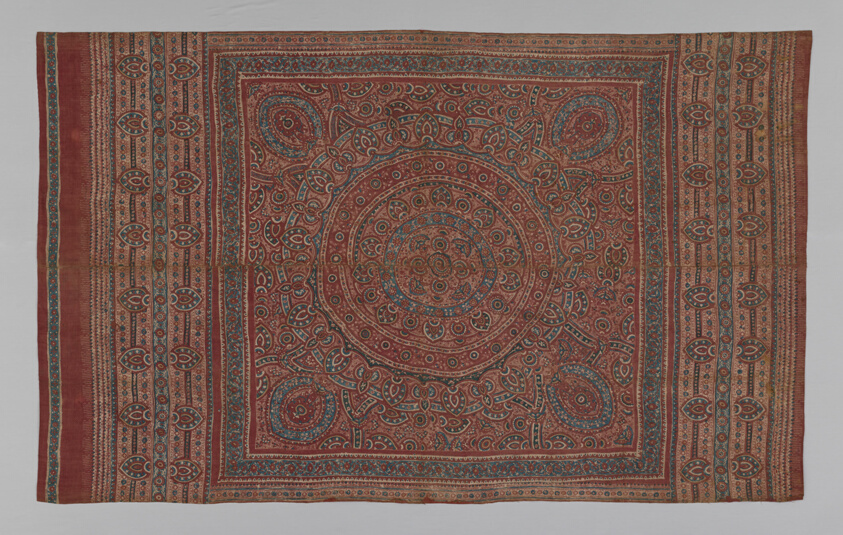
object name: Textile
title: Heirloom Textile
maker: India, Gujarat; Found in the Toraja area of Sulawesi, Indonesia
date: 15th/17th century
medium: Cotton, plain weave; resist-dyed; two loom widths joined, all selvages present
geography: India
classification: textile; weaving - printed; weaving